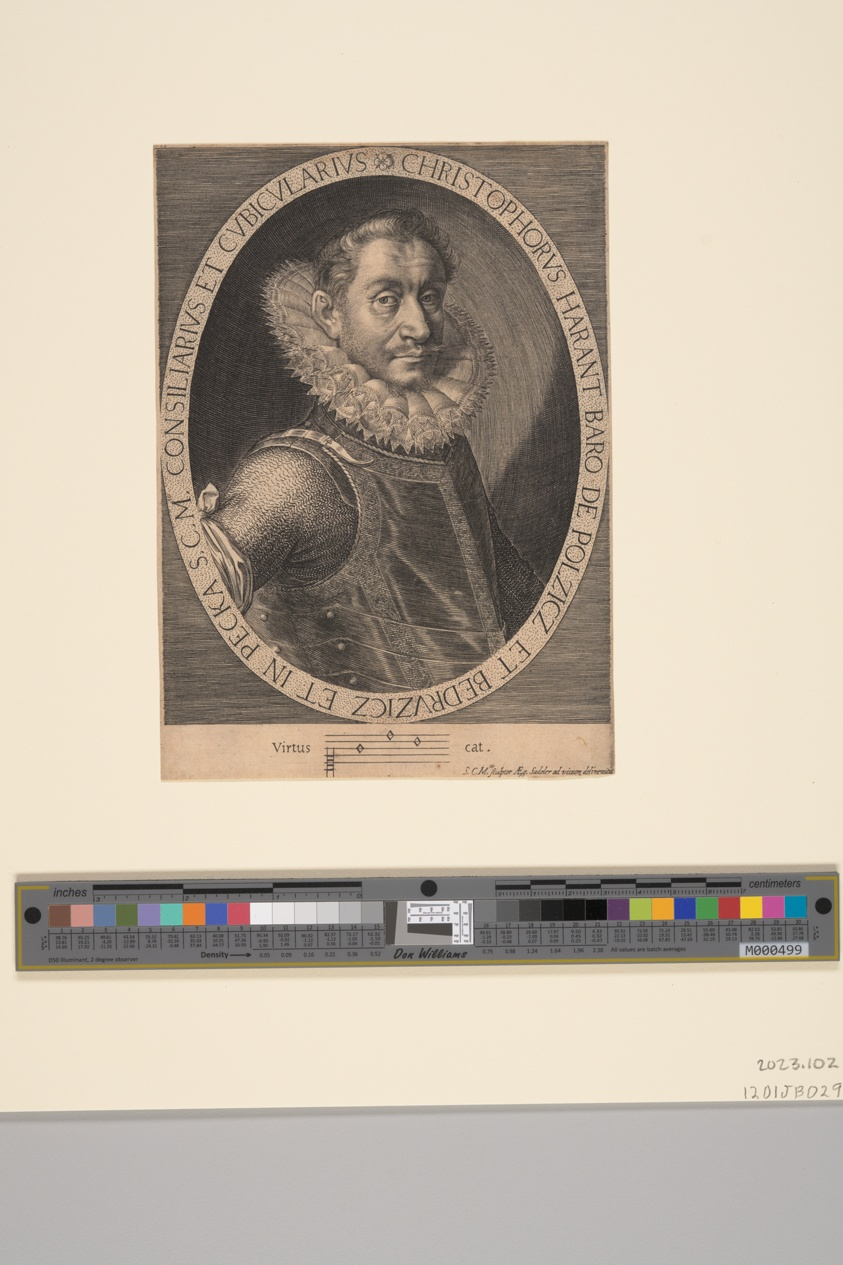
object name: Print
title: Christopher Harant, Czech Nobleman and Humanist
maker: Aegidius Sadeler II; Flemish, c. 1570–1629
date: c. 1600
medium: Engraving on paper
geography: Flanders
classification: engraving; paper; print; prints and drawing